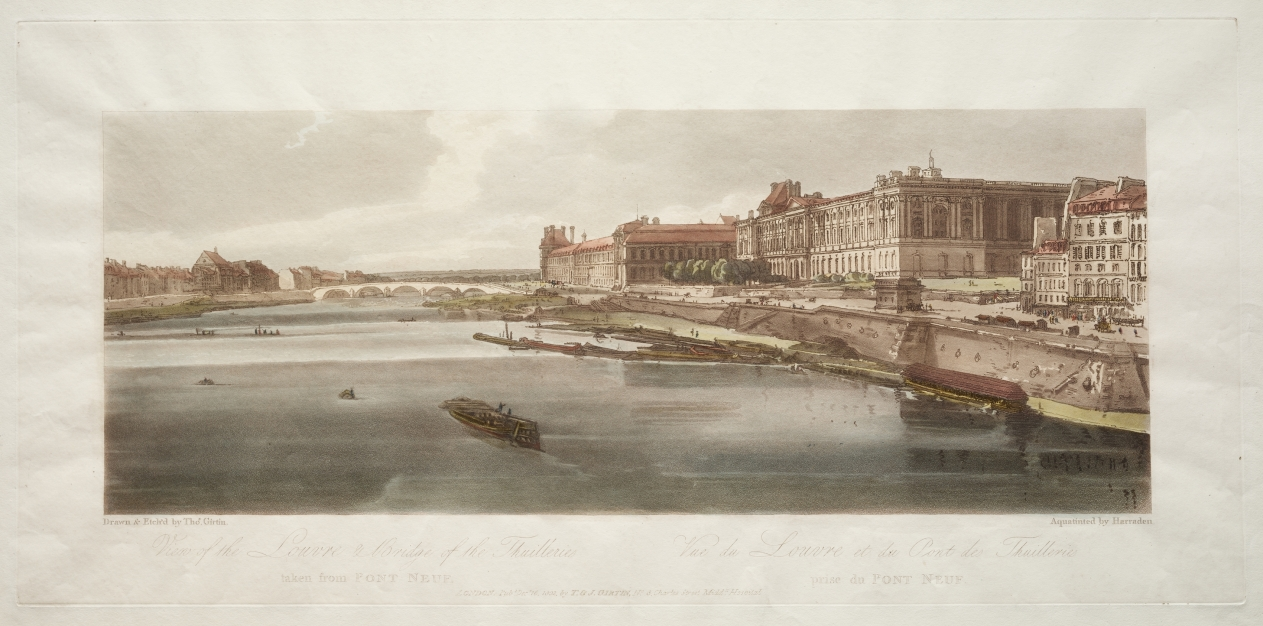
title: A Selection of Twenty of the Most Picturesque Views in Paris: View of the Louvre & Bridge of the Thuilleries taken from Pont Neuf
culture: England, 19th century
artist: Thomas Girtin (British, 1775–1802)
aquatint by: J.B. Harraden (British)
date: 1802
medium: softground etching and aquatint printed in brown, hand-colored with watercolor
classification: Print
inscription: In plate: Drawn & Etch'd by Thos Girtin; Aquatinted by J. B. Harraden; LONDON: Pubd Decr 16, 1802 by John Girtin, No. I, Little Newport Street, Gerrard Street, Soho